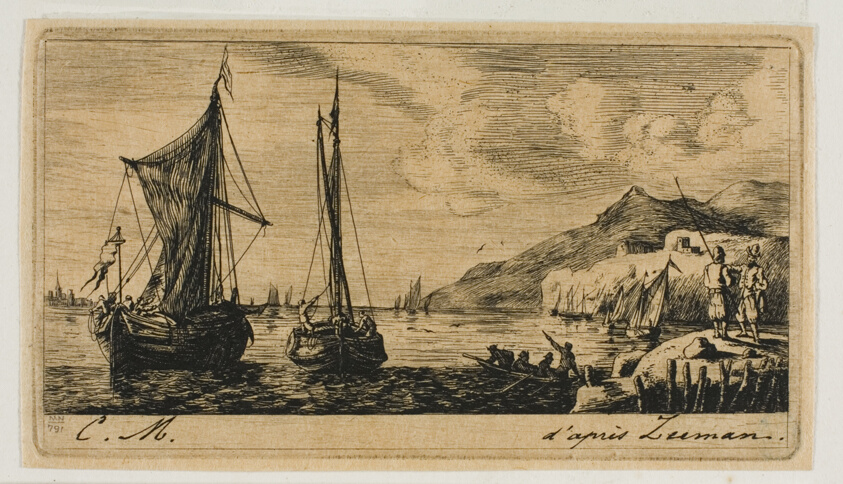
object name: Print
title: Calais Boats in Vlissingen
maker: Charles Meryon (French, 1821-1868); after Reinier Nooms (Dutch, c. 1623-c. 1664)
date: 1850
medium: Etching, drypoint, engraving and roulette on tan laid paper, hinged to ivory laid paper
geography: France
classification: etching; print; prints and drawing